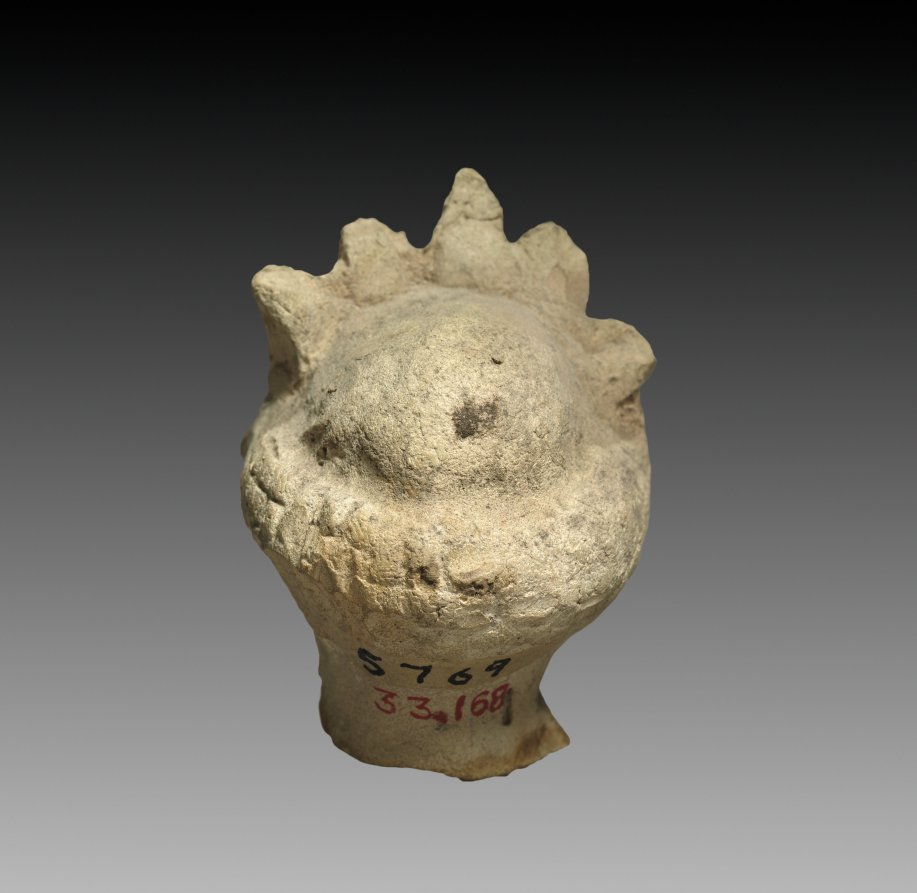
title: Head of a Goddess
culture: Parthian Empire (247 BCE–224 CE)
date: 1–200 CE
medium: terracotta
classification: Sculpture